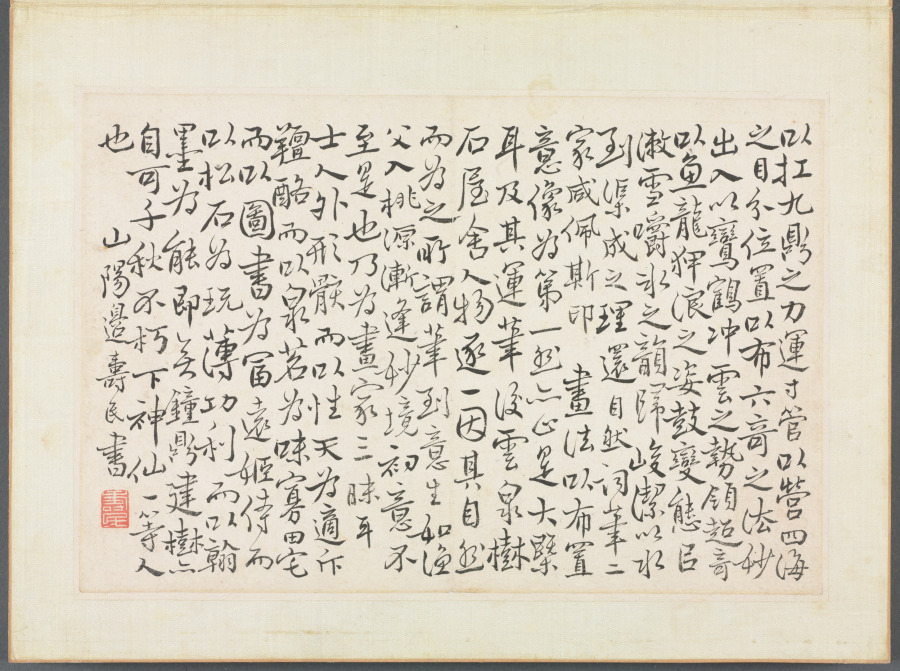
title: Album of Calligraphy and Paintings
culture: China, Qing dynasty (1644-1911)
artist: Bian Shoumin (Chinese, 1684–1752)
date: first half of the 1700s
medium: album leaf; ink and color on paper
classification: Painting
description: The artist Bian Shoumin is known for his depiction of wild geese, water, and reeds. The migrant birds in autumn and winter evoked, in the minds of the Chinese intelligentsia, a time of parting and sorrow.